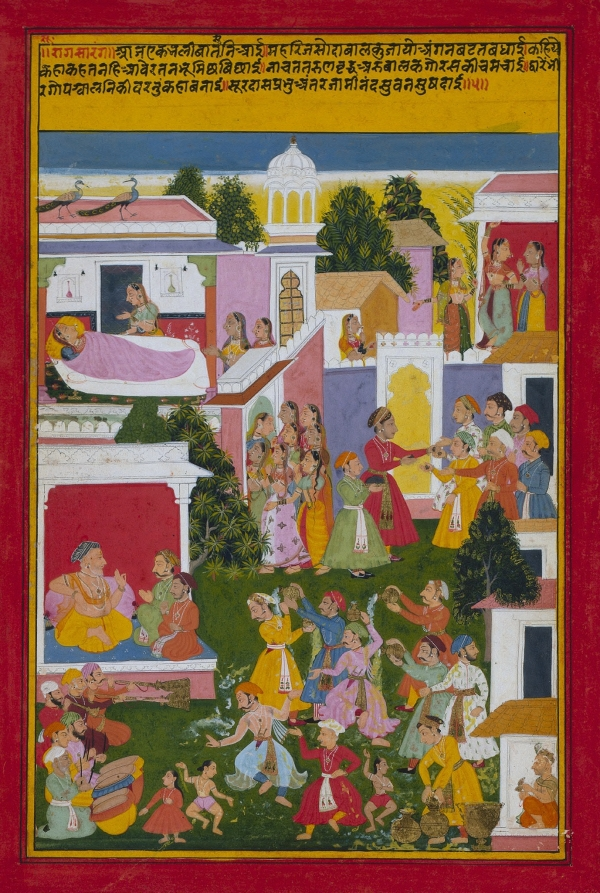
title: The Birth of Krishna, from a Sursagar of Surdas (Indian, c. 1480–1580)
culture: Northwestern India, Rajasthan, Rajput Kingdom of Mewar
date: 1705–10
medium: Gum tempera, ink, and gold on paper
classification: Painting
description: The blind poet and Hindu saint Surdas (1578/79–c. 1581), a devotee of Krishna, is shown in the hut at the lower right corner playing cymbals to measure meter as he recites his poem, called Sursagar. Verse 5 is written at the top of the page, and the scenes of festivities surrounding the arrival of the newborn Krishna are depicted throughout the rest of the painting. His adoptive mother Yashoda lies with the infant in the chamber at the upper left. His dark skin led to his being named Krishna, meaning dark, and shown as blue. Women clamor at her door to see the baby, as the men of the village receive silver coins being distributed on behalf of Nanda, the village elder and Krishna’s adoptive father, who is seated at the left receiving two well-wishers. Below, men and children of the cowherd village celebrate by pouring pots of curds and ghee over each other and dancing to the sounds of horns and drums.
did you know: Many poets in Udaipur styled themselves as "Surdas."